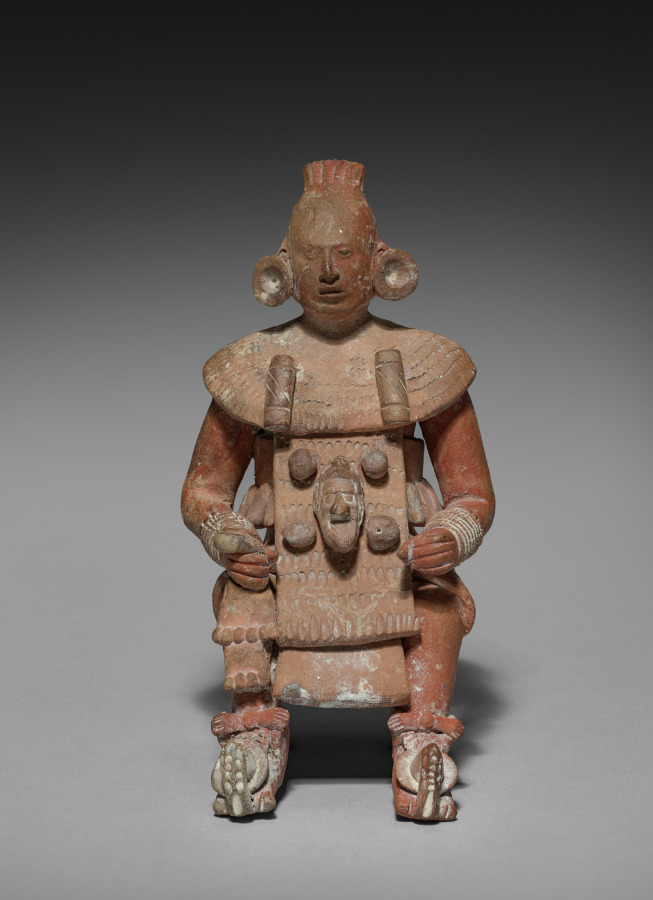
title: Seated Lord with Removable Headdress: Figure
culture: Mesoamerica, Maya, probably Jaina Island, Late Classical period, 7th-9th century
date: 600–800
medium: ceramic and slip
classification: Ceramic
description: The major Maya grave offerings on Jaina Island were ceramic figurines that depict deities and humans in a variety of roles. The seated figure represents a male, perhaps another warrior, who wears a huge zoomorphic headdress. A skeletal face with articulated jaw descends from the headdress to fit as a mask over the figure’s face.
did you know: It is estimated that some 20,000 people were buried on the tiny island of Jaina over a 500-year period.